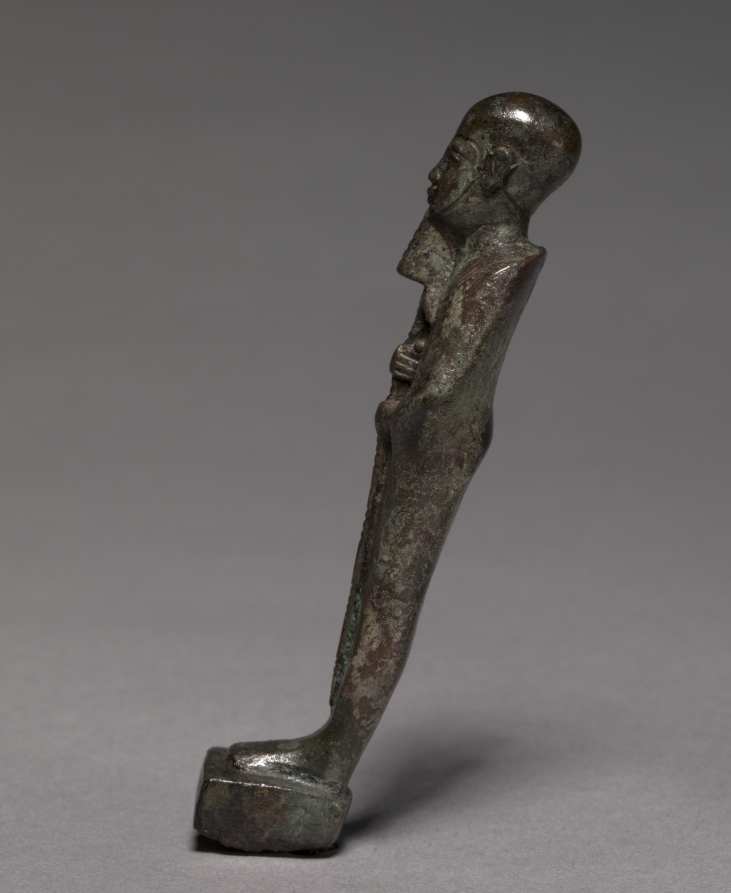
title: Statuette of Ptah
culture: Egypt, Late period (715–332 BCE), Dynasty 26 or later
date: 664–525 BCE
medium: bronze, solid cast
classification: Sculpture